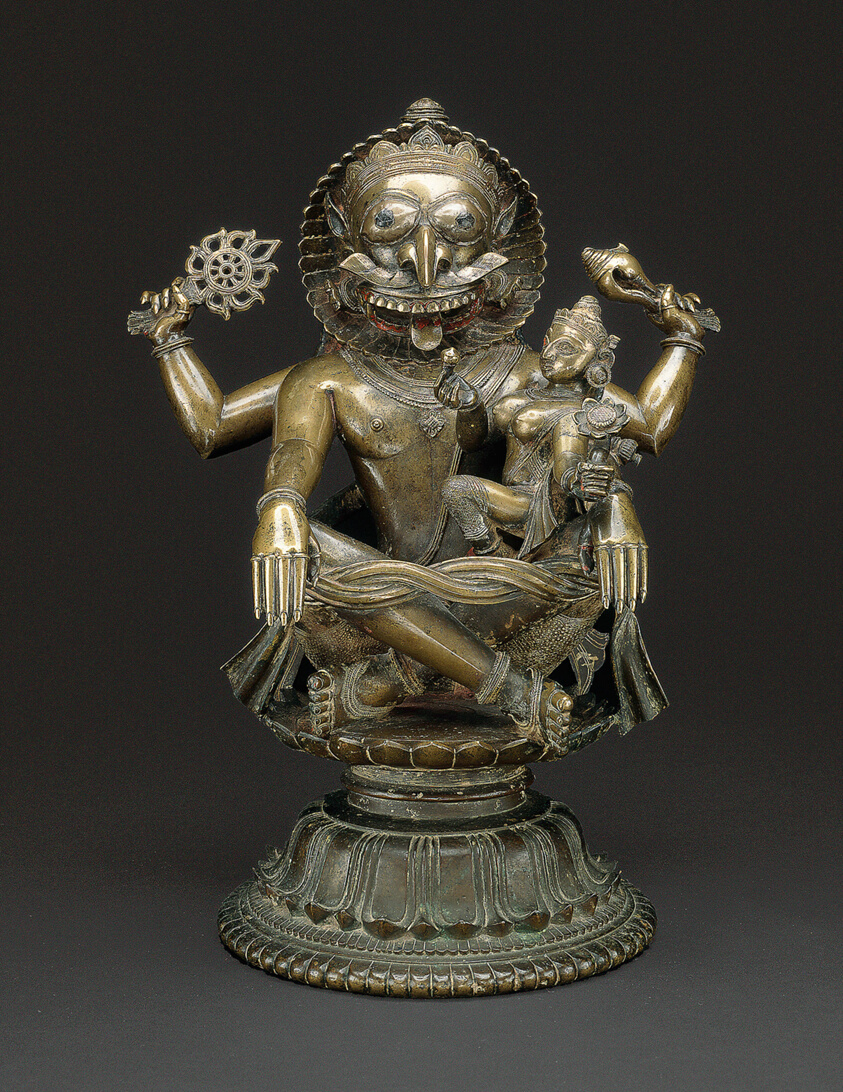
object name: Sculpture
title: Lion-Headed Incarnation of God Vishnu (Narasimha)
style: South Asian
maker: India; Orissa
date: c. 15th century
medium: Bronze with silver inlay and traces of pigment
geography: Odisha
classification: bronze; asian art; sculpture